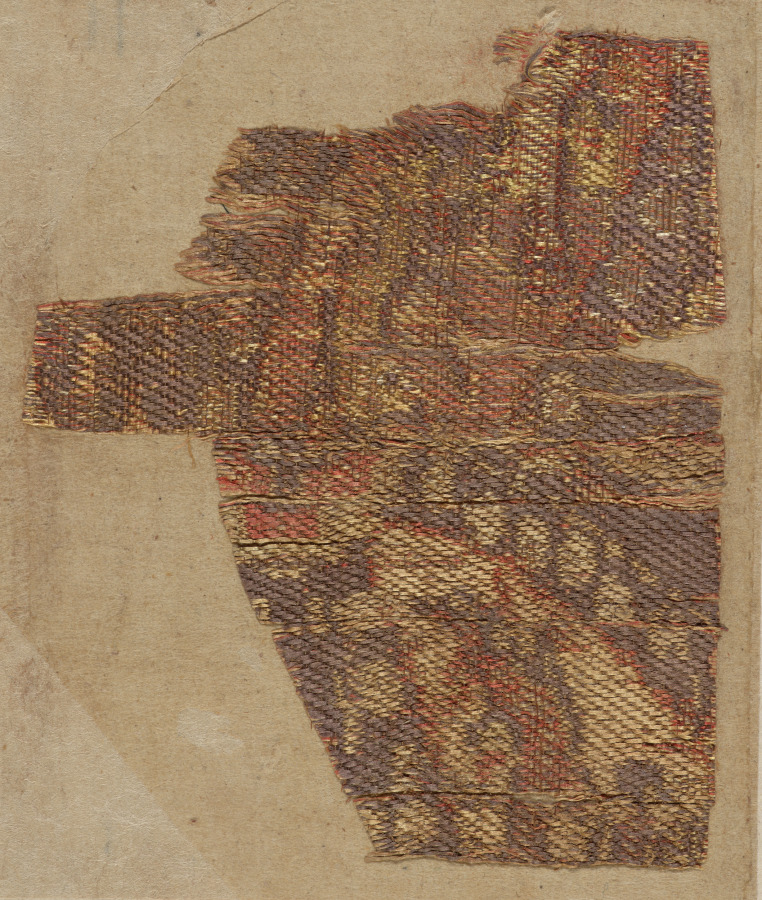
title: Fragment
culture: China or Japan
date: 700s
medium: compound twill, silk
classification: Textile